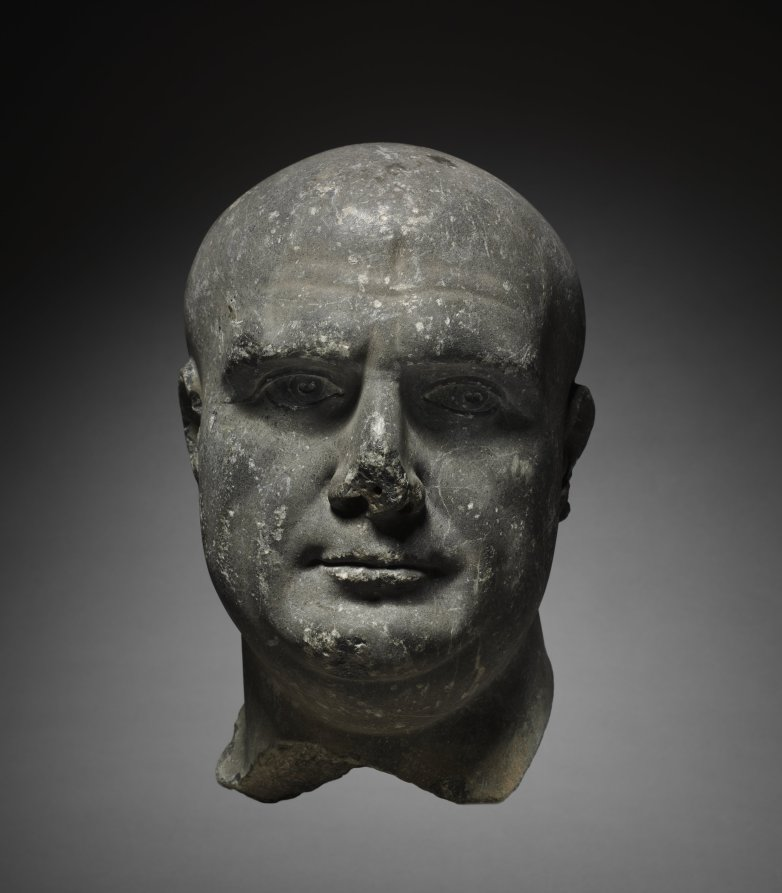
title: Portrait Head of a Priest of Isis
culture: Italy, Roman style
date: 100–200 CE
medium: limestone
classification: Forgery